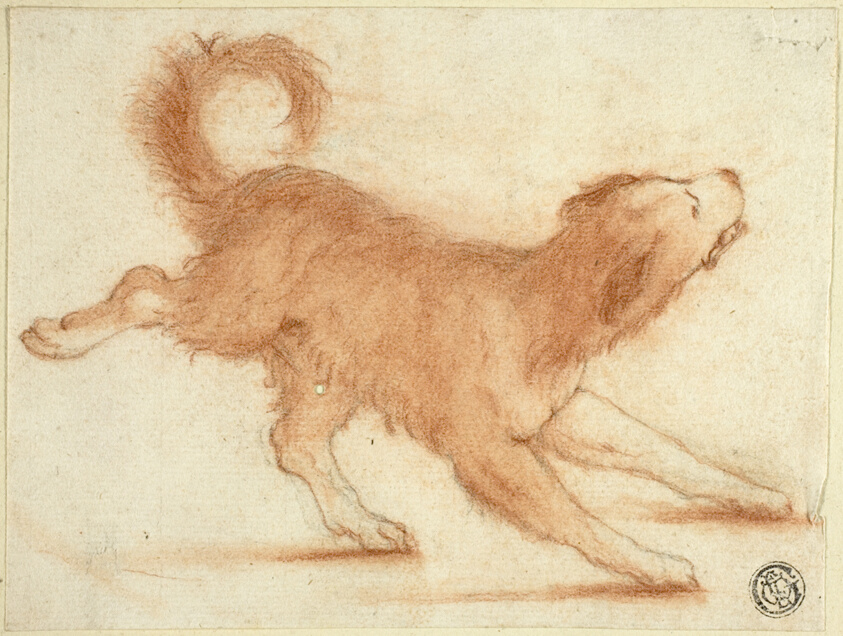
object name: Drawing and Watercolor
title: Growling Dog Ready to Pounce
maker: Attributed to Dirk Valkenburg; Dutch, 1675-1721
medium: Red and black chalk, with stumping, on ivory laid paper, tipped onto cream wove paper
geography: Holland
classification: chalk; drawings (visual works); prints and drawing